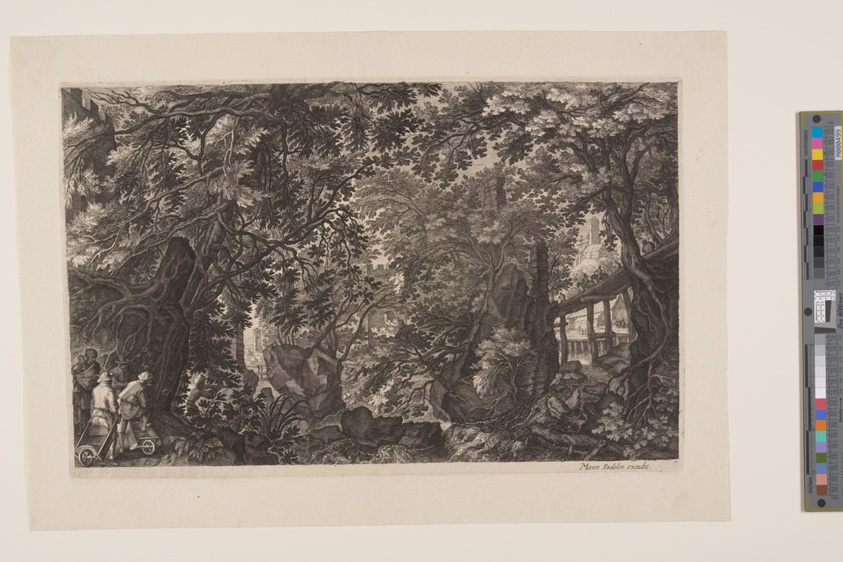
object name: Print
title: Scene Eight: A Forest with a Wooden Bridge, from Eight Scenes from Bohemia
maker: Aegidius Sadeler II (Flemish, c. 1570–1629); after Pieter Stevens (Flemish, 1567-after 1624)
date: 1610/20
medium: Engraving on ivory laid paper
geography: Flanders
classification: print; paper; prints and drawing; engraving